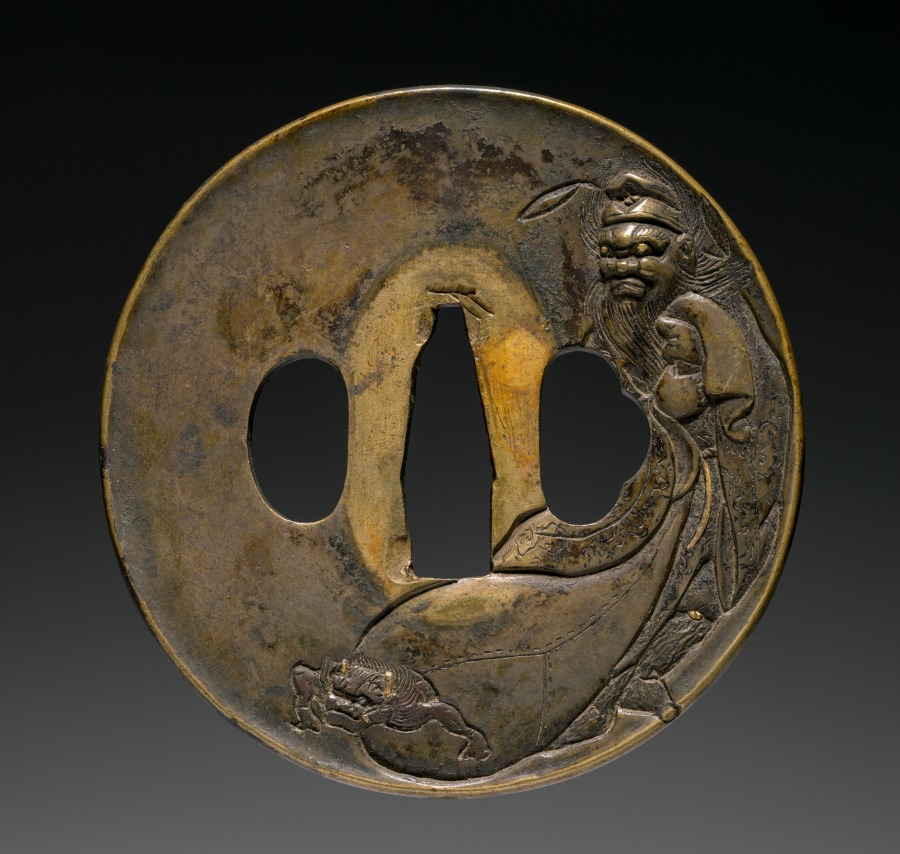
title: Sword Guard (Tsuba) with Zhong Kui (Shōki) the Demon Queller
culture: Japan, possibly Edo period (1615-1868)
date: c. 1615–1868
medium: brass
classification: Arms and Armor